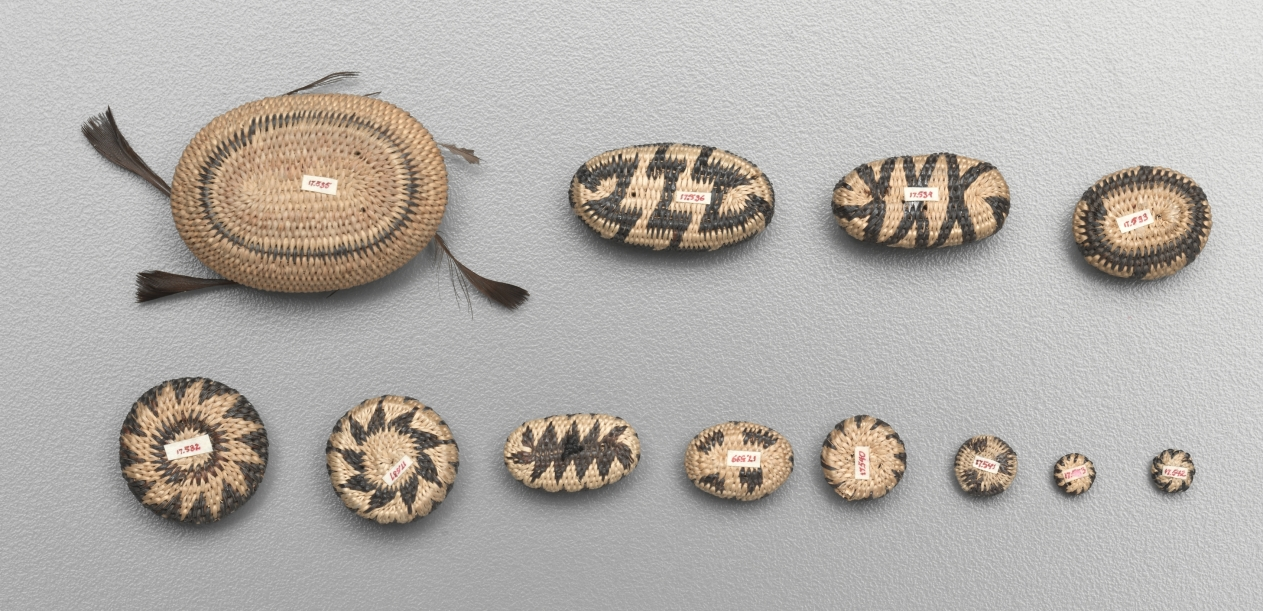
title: Miniature Rhomboidal Basket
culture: California, Pomo, 20th century (?)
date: Early 1900s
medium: coiled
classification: Basketry